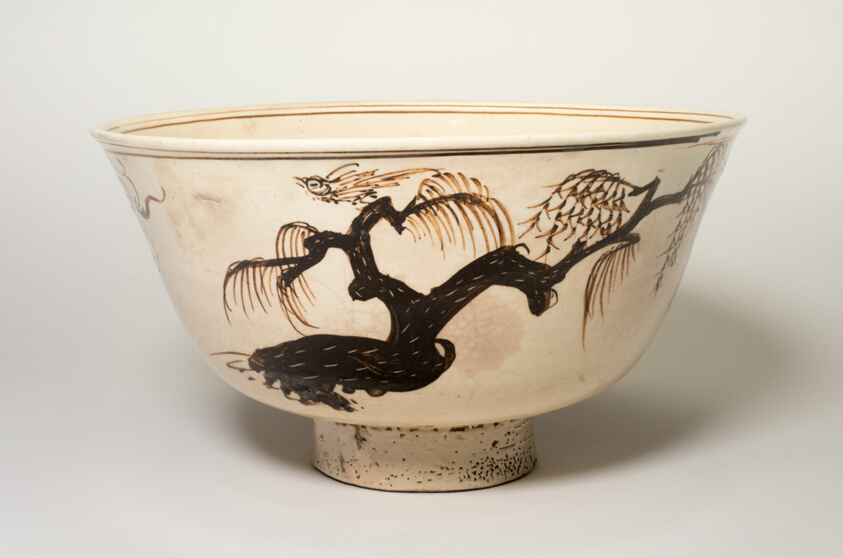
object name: Vessel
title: Bowl with Grapes, Willow Tree, and Bird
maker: China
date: Yuan or Ming dynasty, 14th century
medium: Cizhou ware; stoneware with white slip and iron-brown glazes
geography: China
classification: stoneware; asian art; ceramics